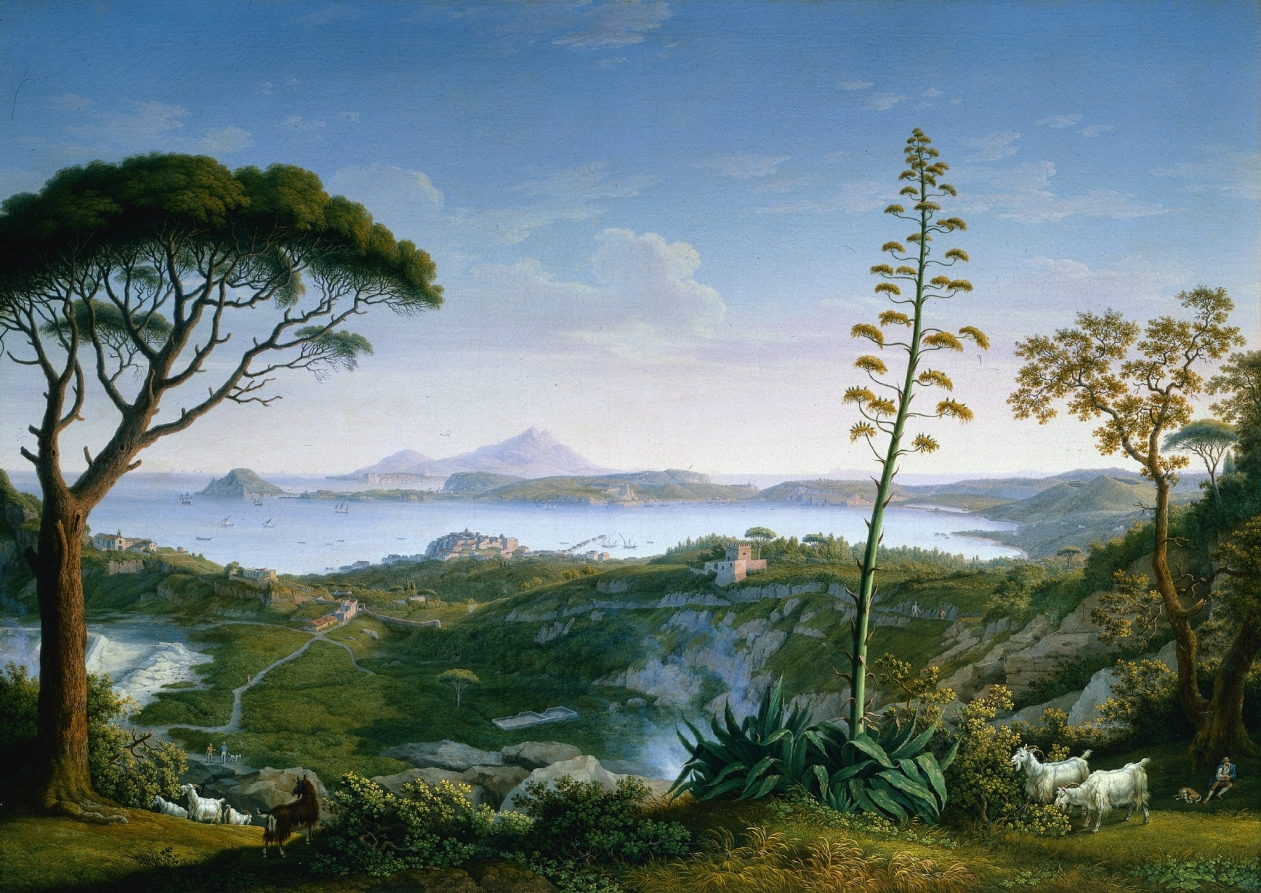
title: View of the Gulf of Pozzuoli from Solfatara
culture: Germany, 19th century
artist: Philipp Hackert (German, 1737–1807)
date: 1803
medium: oil on canvas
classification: Painting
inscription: Inscribed and signed bottom edge to left of center in brown paint: Vue prise sur la Solfatare a Pozzoule, / peint par Philippe Hackert 1803.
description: Attracted to its dramatic vistas, volcanoes, exotic peasants, and classical ruins, landscape painters of the 1700s and 1800s flocked to the countryside around Naples. This view looks west toward the Gulf of Pozzuoli from just above the Solfatara, an area of volcanic steam vents. The ancient town of Pozzuoli, where the apostle Paul landed on his way to Rome, lies in the distance. Hackert's attention to detail and rendering of form with extreme lucidity is characteristic of German Romantic painting.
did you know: While in Naples, the German writer Johann Wolfgang von Goethe took painting lessons from Philipp Hackert; their meetings were documented in Goethe's travelogue Italienische Reise (Italian Journey).